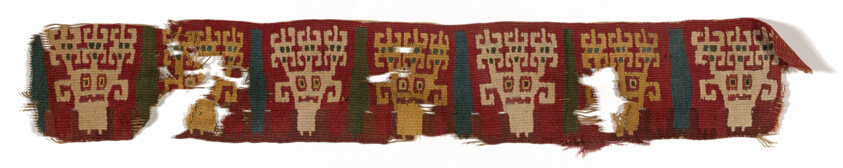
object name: Textile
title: Fragment (Band)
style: nazca, andean, andes, Pre-Columbian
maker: Nazca-Wari; Probably south coast, Peru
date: A.D. 700/900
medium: Slit tapestry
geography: Peru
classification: textile; weaving